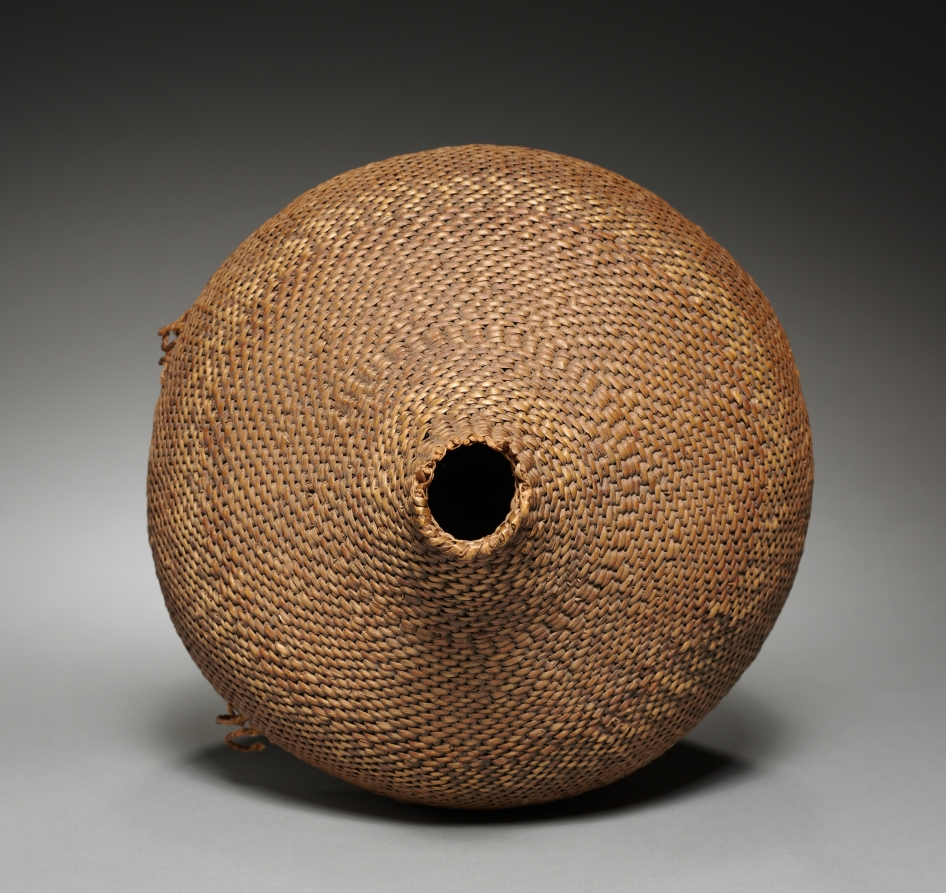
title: Seed Storage Jar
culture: Great Basin, Paiute, Kern County, Unassigned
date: Unassigned, before 1917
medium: peeled and unpeeled willow, diagonal twine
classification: Basketry